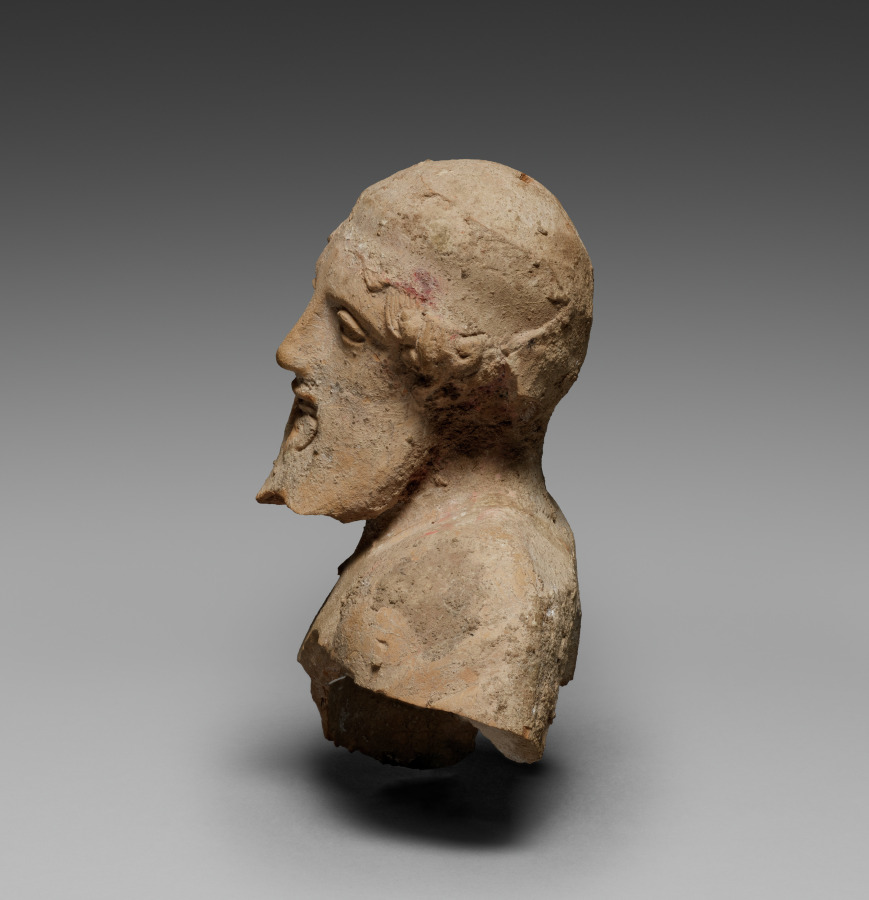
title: Fragment of a Reclining Male Figure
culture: Greek/South Italian, Taranto (ancient Taras)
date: 450–350 BCE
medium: terracotta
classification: Sculpture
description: This terracotta figure depicts a bearded man with his head tilted toward his left shoulder, suggesting that he is reclining. At Greek banquets, the attendees reclined while eating. Banquet imagery was very popular, including in the Greek colonies in Italy. This man likely originally had an elaborate headdress separately made and attached over the smooth part of the head. The clay on the figure’s right shoulder is probably the remains of “ribbons” attached to his headdress. There are traces of red pigment in the hair.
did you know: Tarantine terracotta banqueters were made from molds, with additional handmade details.